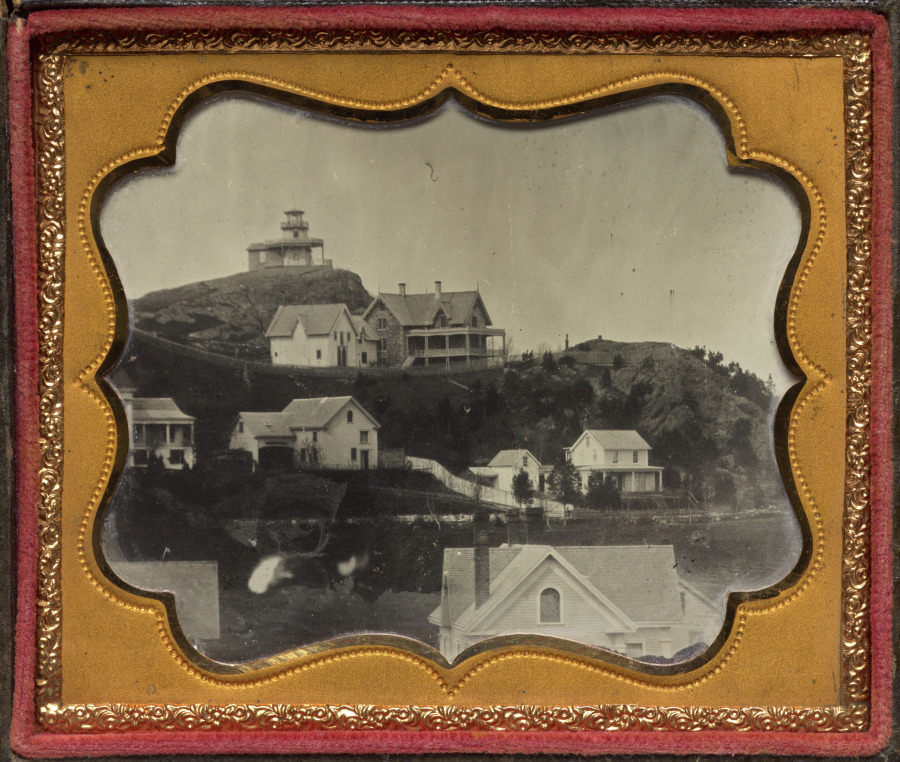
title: High Rock Tower and Stone Cottage, Lynn, Massachusetts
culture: America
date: c. 1862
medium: ambrotype, sixth plate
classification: Photograph